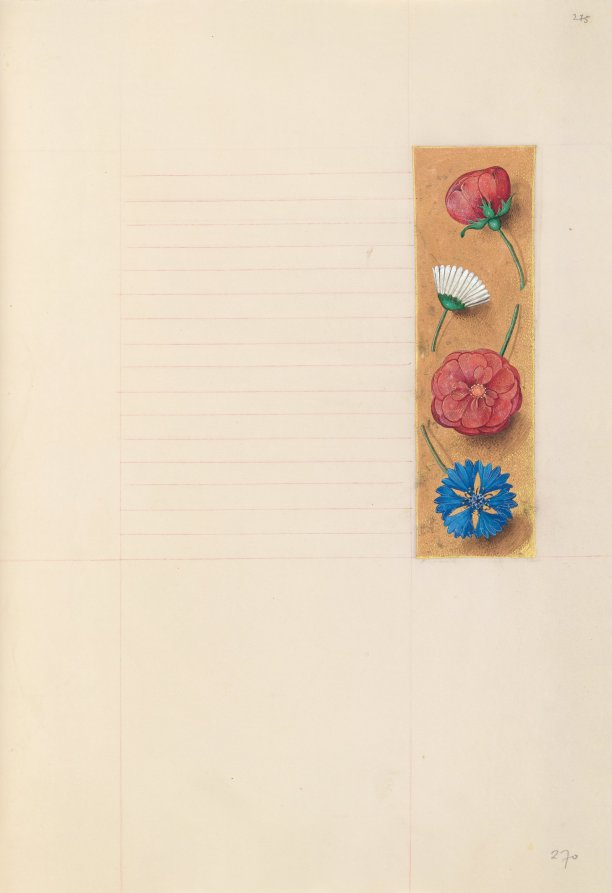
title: Hours of Queen Isabella the Catholic, Queen of Spain: Fol. 275r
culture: Flanders, Ghent and Bruges, late 15th century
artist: Master of the First Prayerbook of Maximillian (Flemish, c. 1444–1519)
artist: and Associates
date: c. 1500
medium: ink, tempera, and gold on vellum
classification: Bound Volume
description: This manuscript was illuminated by a circle of at least five highly organized manuscript painters active in the Flemish cities of Ghent and Bruges. The principal illuminator was Alexander Bening, who painted the majority of the book's miniatures. Manuscripts produced by this circle of artists are renowned for the decoration of their borders, which typically feature a rich variety of realistically-painted flowers, birds, and butterflies. This prayer book, called a book of hours, was intended not for a cleric, but for the private devotions of a lay person-in this case, Isabella the Catholic, Queen of Spain (1451-1504). Isabella's coat of arms embellishes the book's frontispiece. It is unlikely that the book was commissioned by the Queen herself; rather, she probably received it as a diplomatic gift from someone courting her patronage, perhaps Cardinal Francisco Jimenez de Cisneros. A Franciscan friar, Jimenez was dependent upon Isabella for his advancement, first to the post of Queen's confessor in 1492, and then to Archbishop of Toledo in 1495.